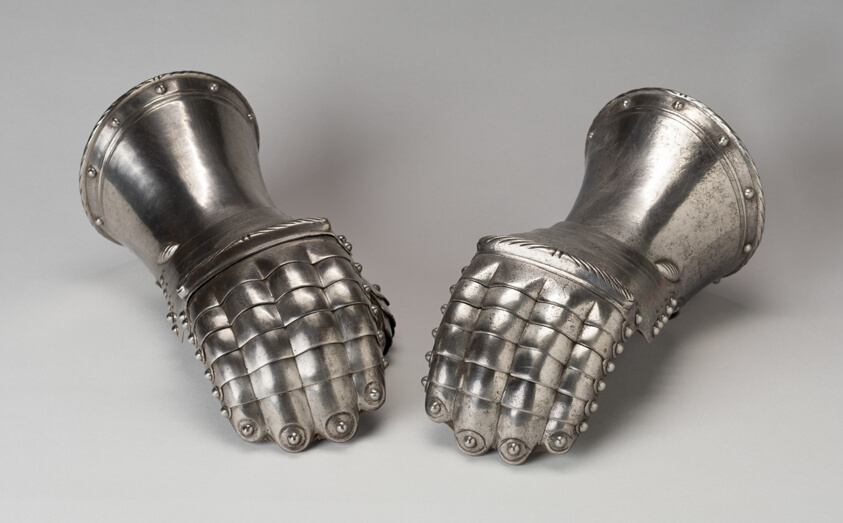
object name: Armor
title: Pair of Mitten Gauntlets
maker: European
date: probably 19th century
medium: Steel and leather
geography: Europe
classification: suit-gauntlet; armor; arms and armor